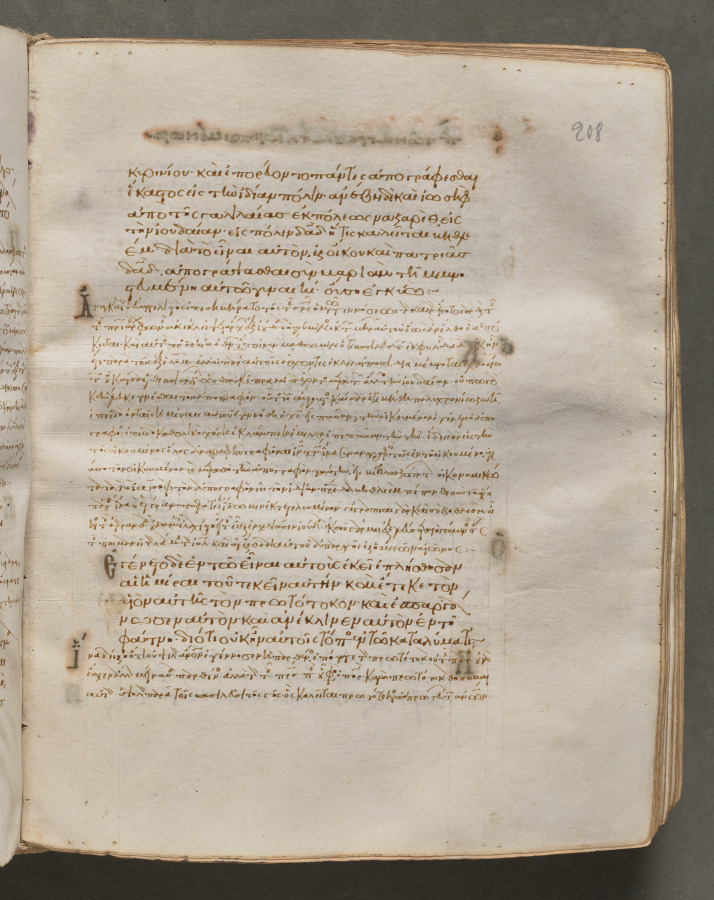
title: Text, folio 208 (recto), from a Gospel Book with Commentaries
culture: Byzantium, Constantinople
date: c. 1000–1100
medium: ink, tempera, and gold on vellum; leather binding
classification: Bound Volume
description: Each of the four gospels in this book opens on a page with brilliantly illuminated borders depicting the author of the text as well as birds-principally peacocks, symbols of the immortality of the soul-and fountains, representing the fountain of life and the salvation of the soul. This volume consists of 428 leaves with texts in Greek. Its level of sophistication suggests that it was probably written and decorated in a monastery in Constantinople.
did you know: Gospel Books were carried in procession through Byzantine churches.